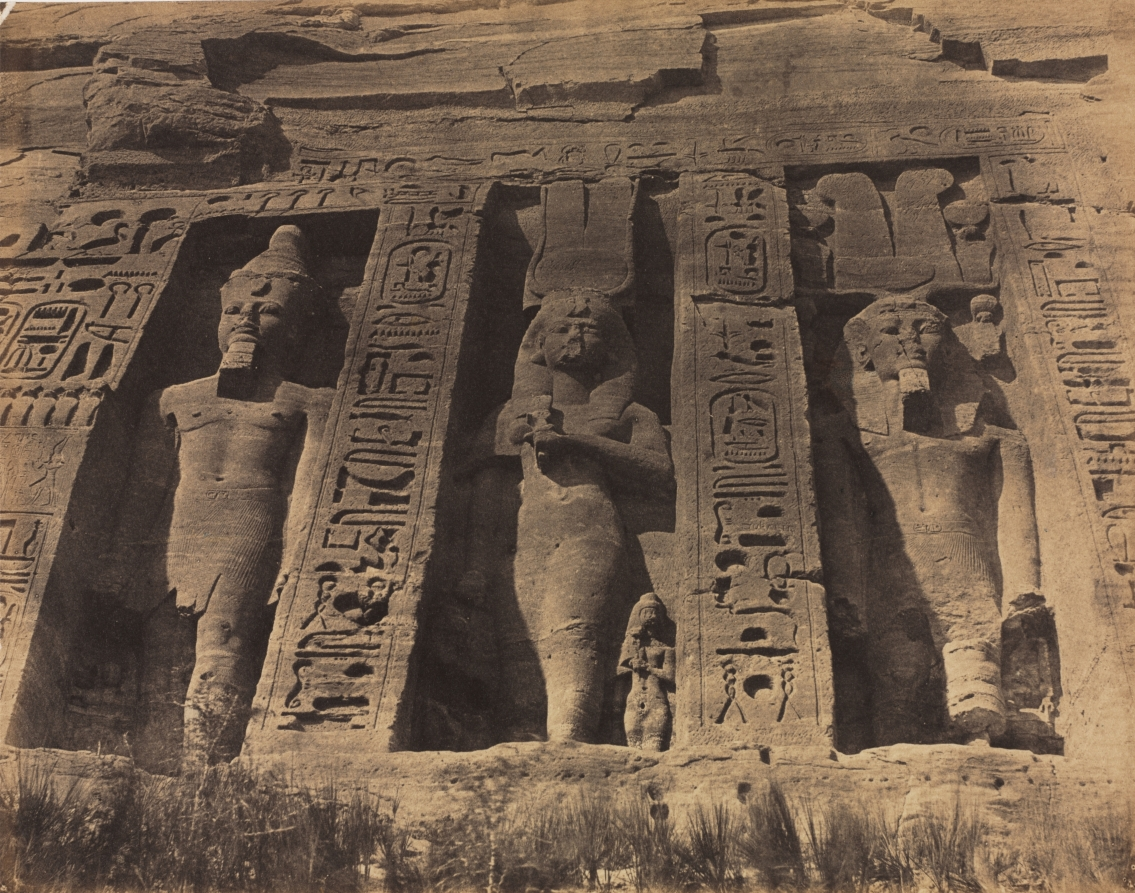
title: Temple of Abu Simbel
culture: England, 19th century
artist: Robert Murray (British, 1822–1893)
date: 1856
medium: salted paper print from paper negative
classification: Photograph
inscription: Written in black ink on mount: "163" Written in pencil on mount: "5x" Written in black on mount: "Temple of Aboo Simbel, Nubia" Written in pencil on verso of mount: "RMACDP 299B" Inscribed in black ink on label: "Photographed by R.Murray: Published by J. Hogarth, 5, Haymarket, London"